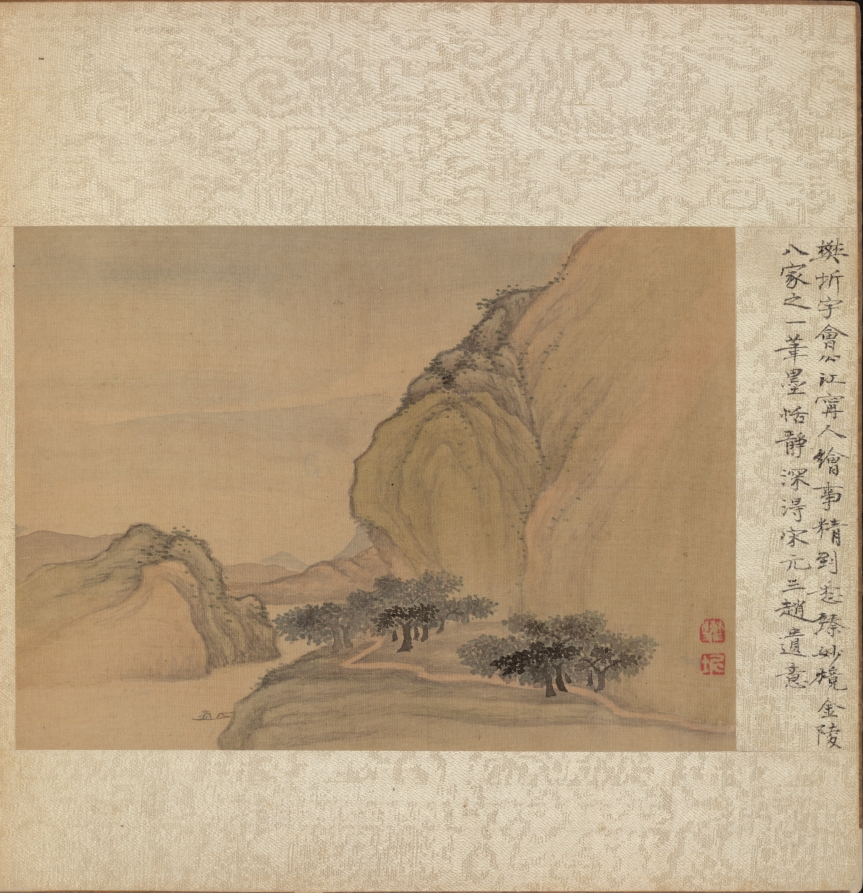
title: Album of Miscellaneous Subjects, Leaf 1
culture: China, Qing dynasty (1644-1911)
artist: Fan Qi (Chinese, 1616–after 1694)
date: early 1650s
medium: album cover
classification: Painting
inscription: Artist seal: Fan Qi 樊圻. Poem by Wang Wu 王武 (1632–1690): A narrow path coiling, winds across rock foundations;/ Old vines and ancient trees meet the sunset's slanting rays./ Unaware that my small boat has gone so far,/ By the time it reverses its oars, the green mountains will be half-covered with clouds.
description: Fan Qi's painting on leaf one may be inspired by Tang dynasty poet's Li Bai's line: A small boat has sailed through ten thousand layers of hills. Wang Wu's colophon facing the painting reads: A narrow path coiling, winds across rock foundations; Old vines and ancient trees meet the sunset's slanting rays. Unaware that my small boat has gone so far, By the time it reverses its oars, the green mountains will be half-covered with clouds.